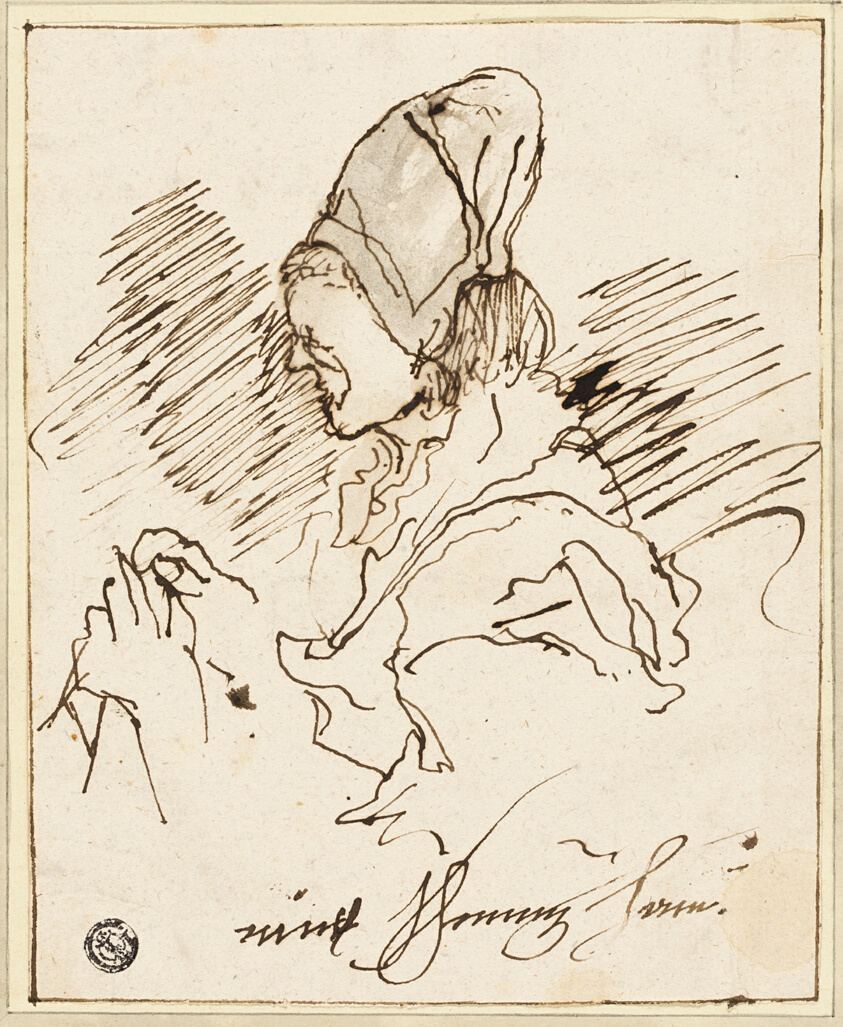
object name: Drawing and Watercolor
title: Seamstress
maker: Attributed to Claude Hoin (French, 1750-1817); or Gian Lorenzo Bernini (Italian, 1598-1680); or an unknown German artist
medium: Pen and brown ink, with brush and gray wash, on ivory laid paper, laid down on ivory laid card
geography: France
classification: pen and ink drawings; drawings (visual works); prints and drawing